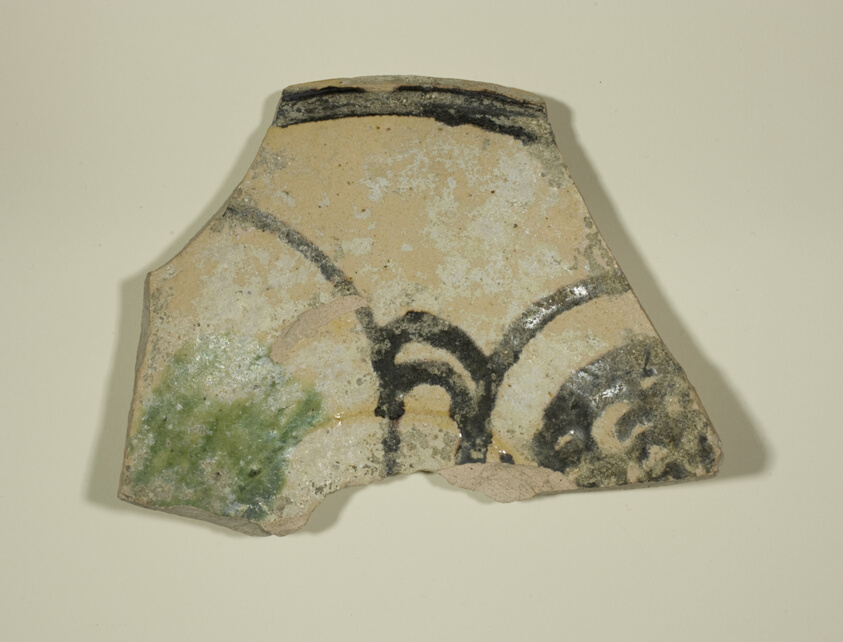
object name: Decorative Arts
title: Fragment of a Plate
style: byzantine, european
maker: Byzantine (Greece, Corinth or Sparta, or Cyprus)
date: 12th-14th century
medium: Ceramic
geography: Byzantine Empire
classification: fragment; ceramics; plate (general, dish); asian art; decorative arts